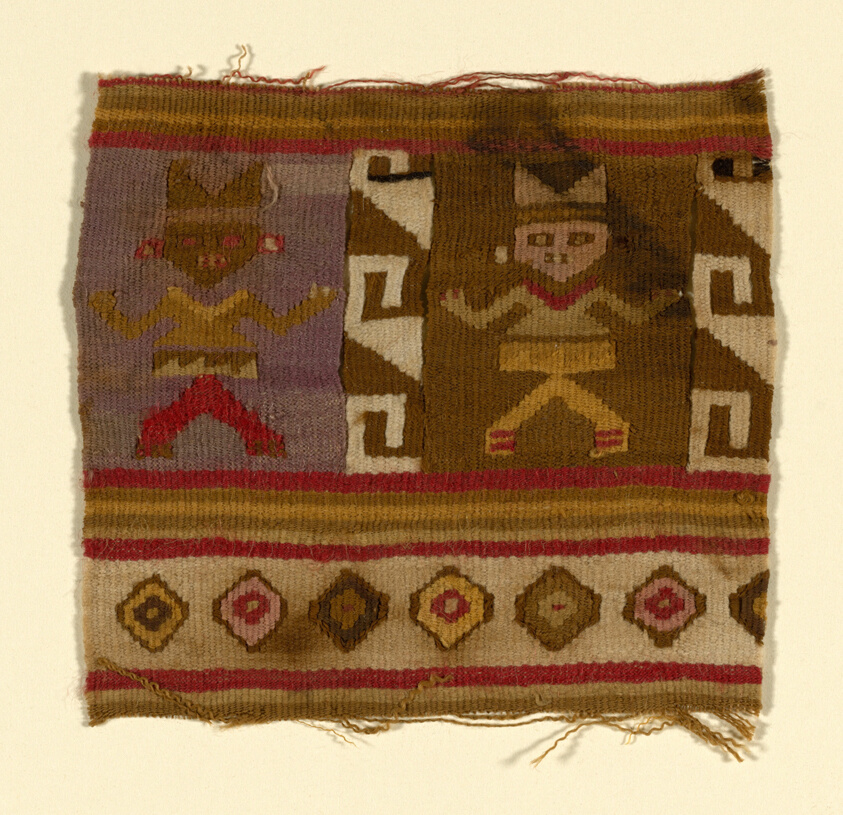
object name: Textile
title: Fragment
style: chancay, late intermediate period, Pre-Columbian, americas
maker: Peru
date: 900/1470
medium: Cotton and wool (camelid), slit tapestry with eccentric and wrapped outlining wefts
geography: Peru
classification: weaving; textile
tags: anthropomorphic figure, waves, stepped motif, lines, squares, diamond shapes, geometric motif